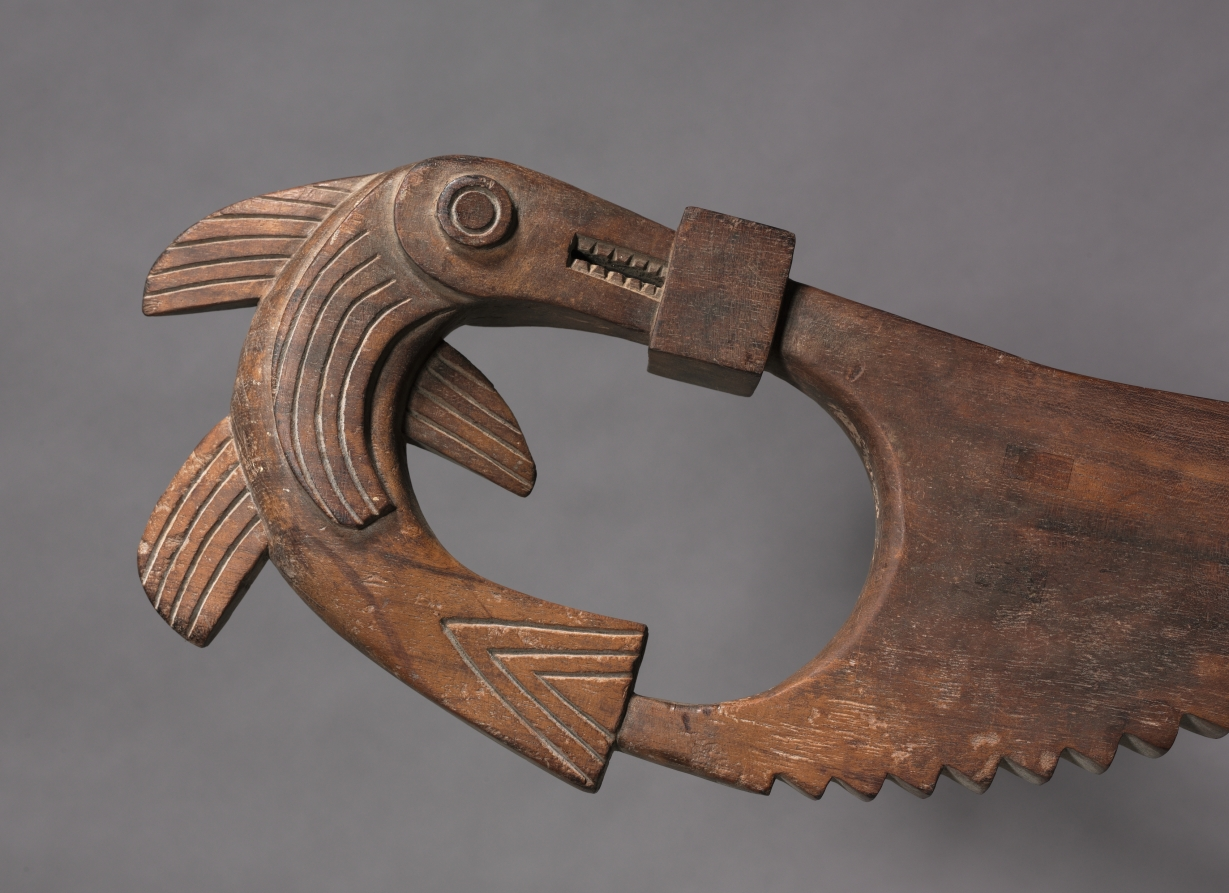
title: Carved Board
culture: Peru, South Coast, Ica Valley, 15th-16th century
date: 1400s-1500s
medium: wood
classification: Sculpture